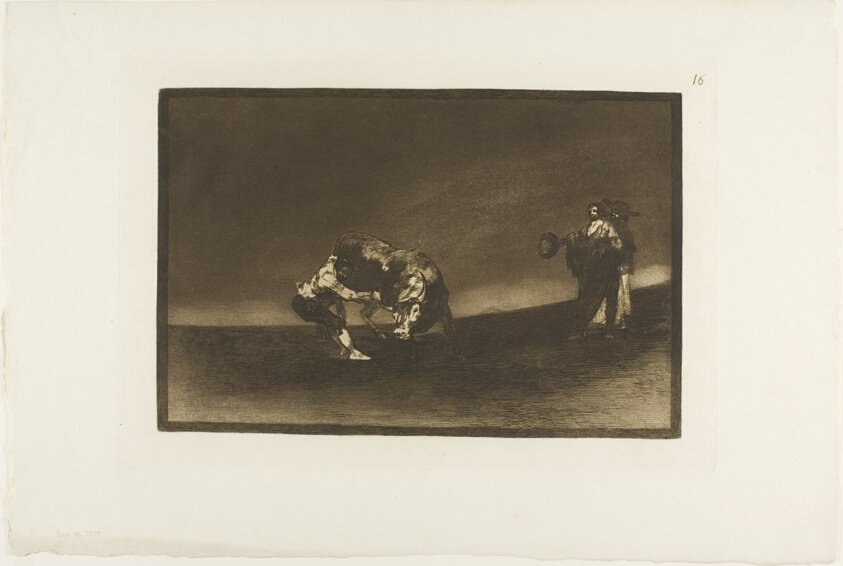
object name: Print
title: The Same Man Throws a Bull in the Ring at Madrid, plate 16 from The Art of Bullfighting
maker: Francisco José de Goya y Lucientes (Spanish, 1746-1828)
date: 1814/16, published 1876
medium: Etching, burnished aquatint, drypoint and burin on ivory laid paper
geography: Spain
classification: etching; print; prints and drawing